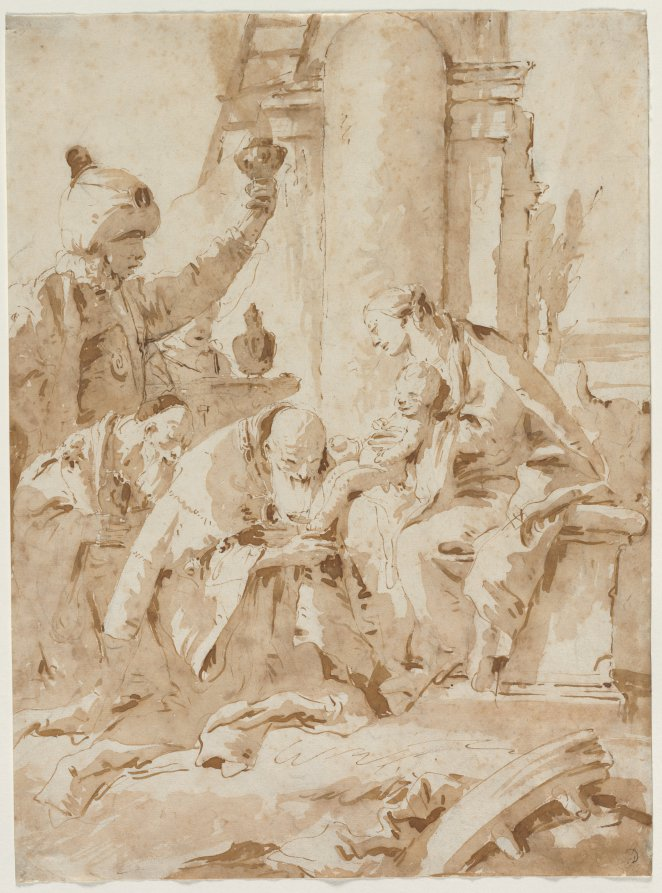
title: The Adoration of the Magi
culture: Italy, Venice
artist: Giovanni Battista Tiepolo (Italian, 1696–1770)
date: c. 1740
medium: pen and brown ink and brush and brown wash, over black chalk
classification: Drawing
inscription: verso, lower left, in graphite: [T?]. 5533; lower right, in graphite: [J?]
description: According to the Gospel of Matthew, three Magi, guided by a star, found the newborn Jesus and laid gifts of gold, frankincense, and myrrh before him. Giovanni Battista (Giambattista) Tiepolo’s drawing of the traditional subject places the Madonna on a platform as she holds the Christ child out toward three approaching magi. Two bearded white magi kneel in supplication as the turbaned black magi stands behind them. Tiepolo plays with the conventions of the Adoration subject by employing an asymmetrical composition. Working over his black chalk underdrawing, traces of which are visible in the figures’ robes, the artist delineated the scene with brown ink, quill pen, and brush before modeling with brown wash. Tiepolo’s mastery over value is evident in his contrasts of dark shadow with light midtones and the luminous white of his paper, producing his celebrated effects of glistening sunlight and clear atmosphere. The broken wheel in the foreground, an attribute of Saint Catherine, also appears in Tiepolo's etching of the same subject (1965.18) to which this drawing may be related.